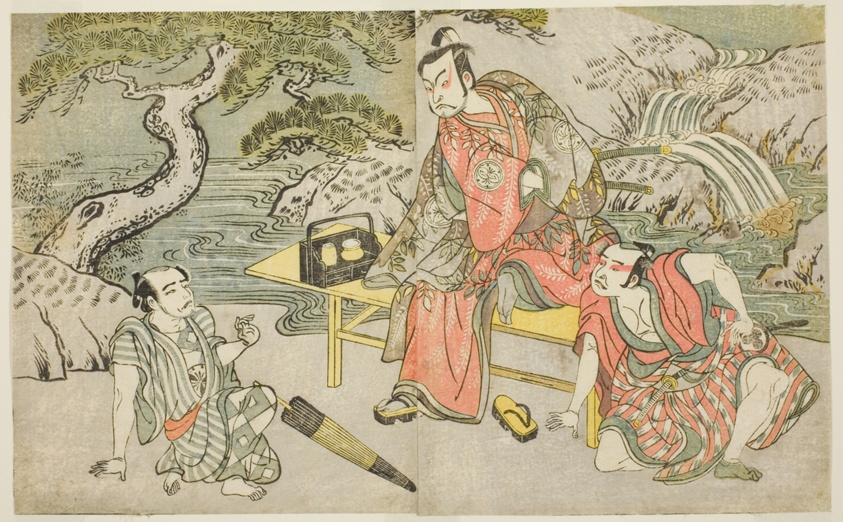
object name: Print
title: The Actors Tomizawa Hanzaburo II as Nagoya Sanzaemon (often called Sanza) (right), Nakamura Juzo II as Fuwa Banzaemon (center), and an Unidentified Actor as the Pickpocket Matsumoto Daishichi (left), in the Play Fuki Kaete Tsuki mo Yoshiwara, Performed at the Morita Theater in the Eleventh Month, 1771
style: Japanese (culture or style)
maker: Katsukawa Shunsho 勝川 春章; Japanese, 1726-1792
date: c. 1772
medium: Color woodblock print; from the illustrated book Yakusha Kuni no Hana (Prominent Actors of Japan)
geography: Japan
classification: woodblock print; print; asian art